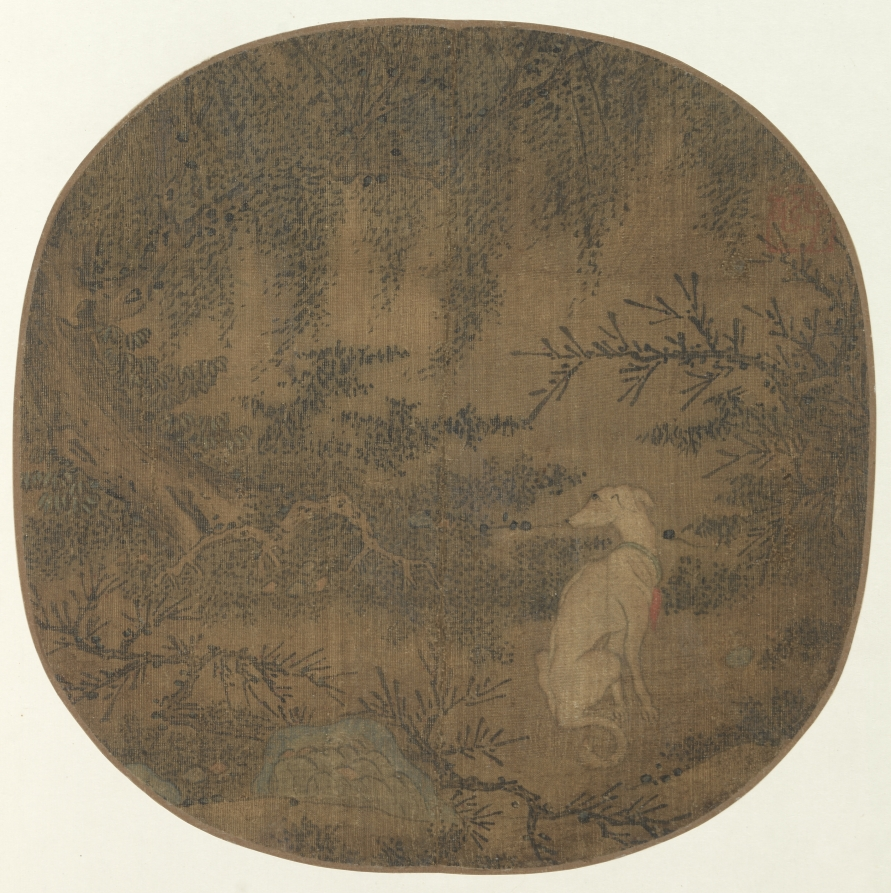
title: Dog Watching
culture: China, Song dynasty (960-1279)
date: 960–1279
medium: Album leaf, ink and color on silk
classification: Painting